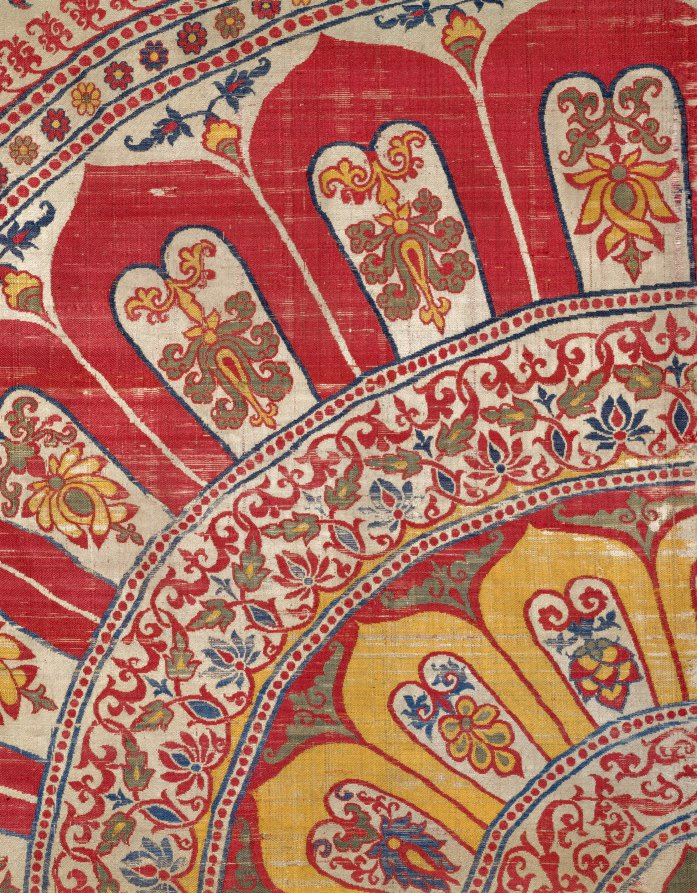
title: Lotus-blossom petal canopy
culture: Northern India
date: c. 1600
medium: silk: lampas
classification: Textile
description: The ceilings of sacred spaces throughout India were carved or painted with concentric circular lotus patterns; many also included textile canopies with the same designs. This exceptionally large example was woven in one complete section on a single loom. In India, the full-blown lotus flower bears solar connotations. It projects the radiance of a sacred or royal presence below. The motif of a dragon bearing down on a winged lion in each of the four corners indicates the designer’s recognition of a motif popular across Islamic Asia, from Turkey to Iran and Mughal India.